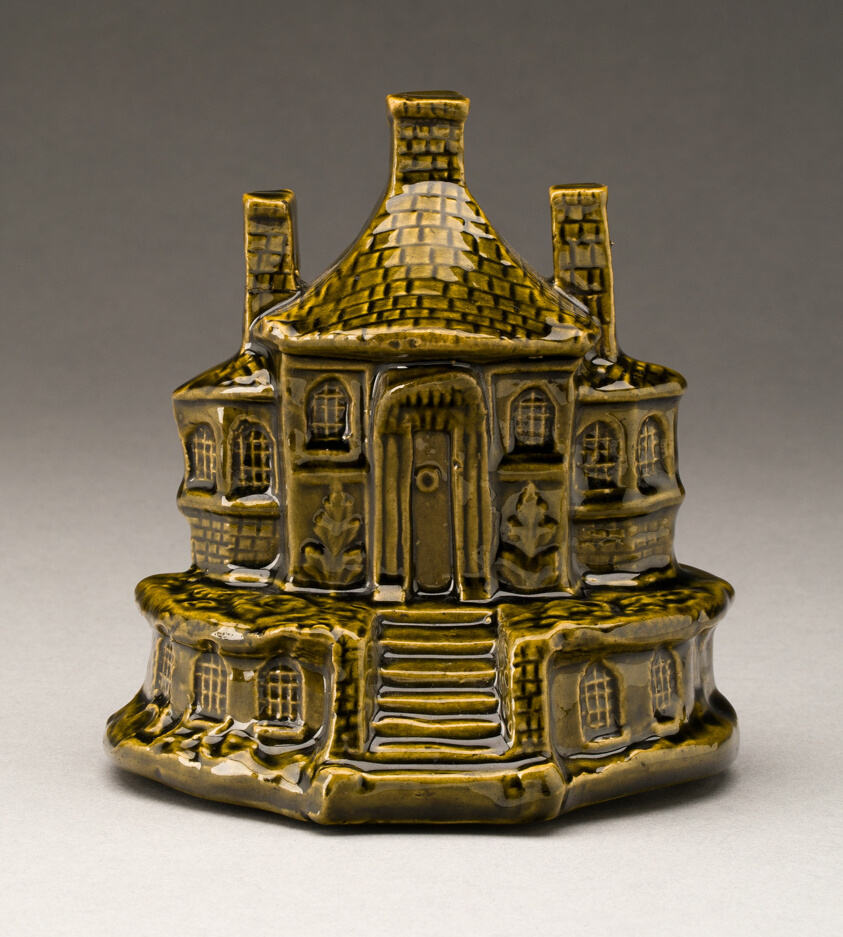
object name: Ceramics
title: Chimney Ornament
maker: England, Staffordshire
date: 1887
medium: Glazed earthenware with polychrome enamel decoration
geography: Staffordshire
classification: ceramics